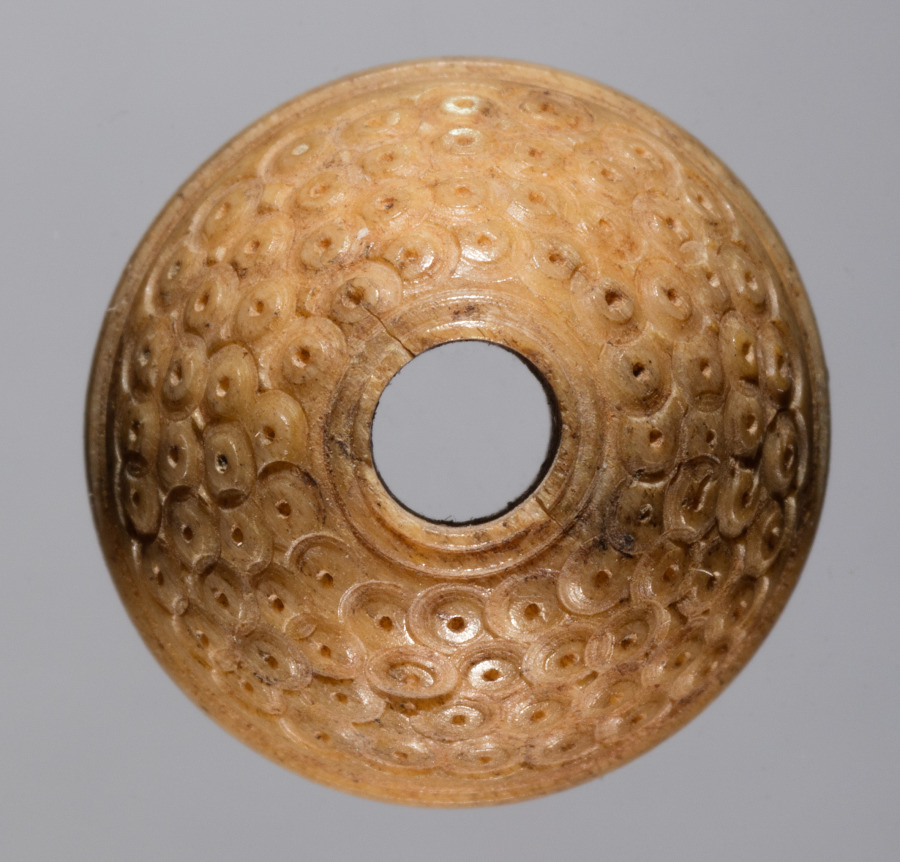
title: Spindle Whorl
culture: Iran, early Islamic period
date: 700s - 900s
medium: bone, incised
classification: Spindle Whorl